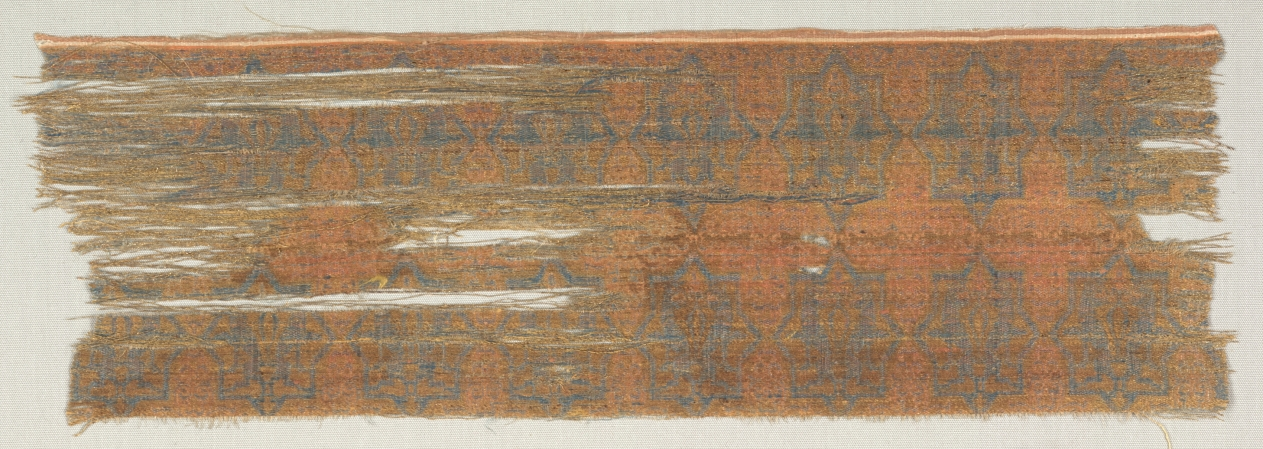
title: Taqueté fragment with star and cross pattern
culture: Spain, probably Almeria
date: 1200s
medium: taqueté: silk and gold thread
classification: Textile